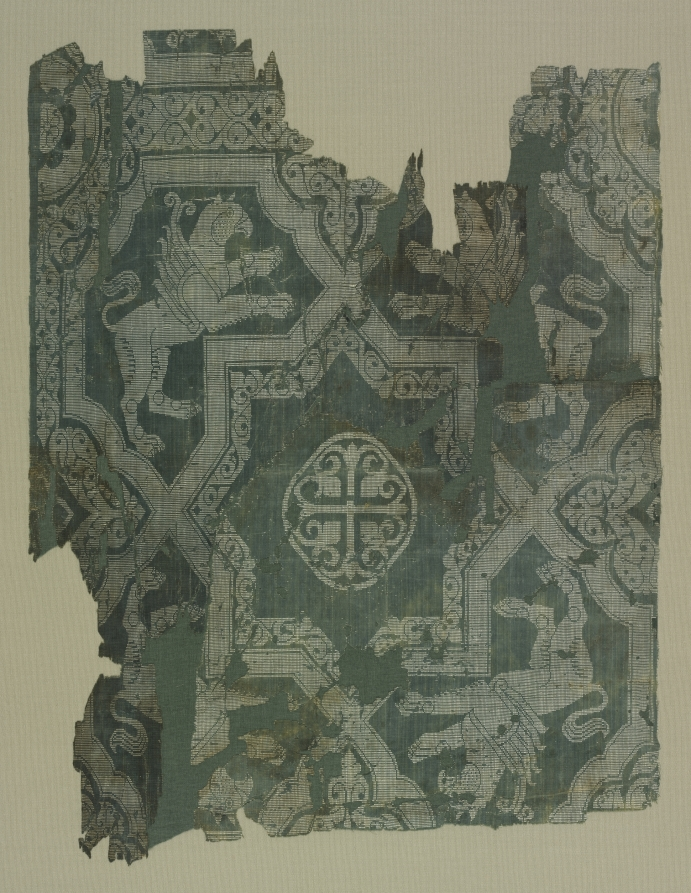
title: Fragment with star pattern and griffins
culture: Iraq or Iran, Buyid period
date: 950–1050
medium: silk: plain weave variation with supplementary weft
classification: Textile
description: This fragment's design consists of interlaced bands, bordered with inner band of foliate ornament, forming an eight-pointed star with center of floriated cross and flanked in four corner compartments by winged griffins. It was woven in green and white silk. The warp in green silk has two wefts, one of green silk and one of white silk floss for the design.